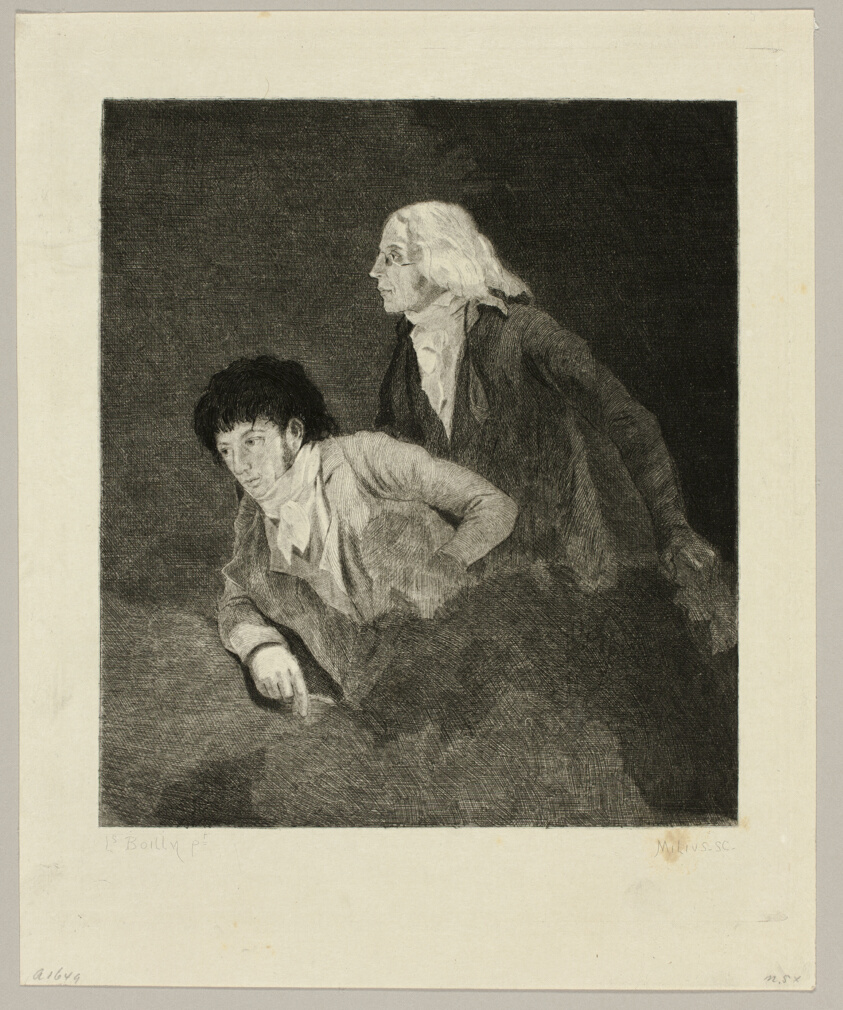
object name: Print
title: Portraits of Isabey and Taunay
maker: Felix Milius (French, 1843-1894); after Louis Léopold Boilly (French, 1761-1845)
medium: Etching and drypoint in black on ivory laid paper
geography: France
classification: etching; print; prints and drawing